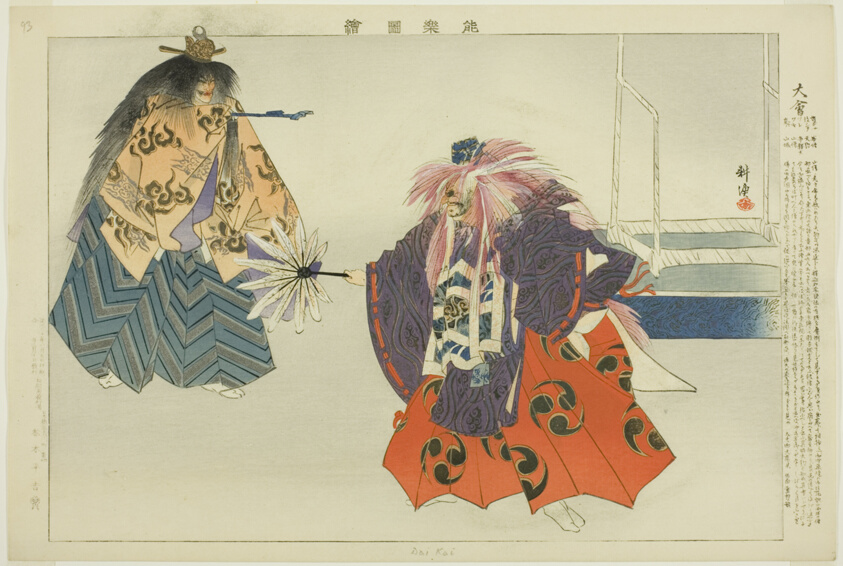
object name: Print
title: Daie, from the series "Pictures of No Performances (Nogaku Zue)"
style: Japanese (culture or style)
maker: Tsukioka Kogyo; Japanese, 1869-1927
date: 1898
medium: Color woodblock print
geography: Japan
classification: woodblock print; print; asian art